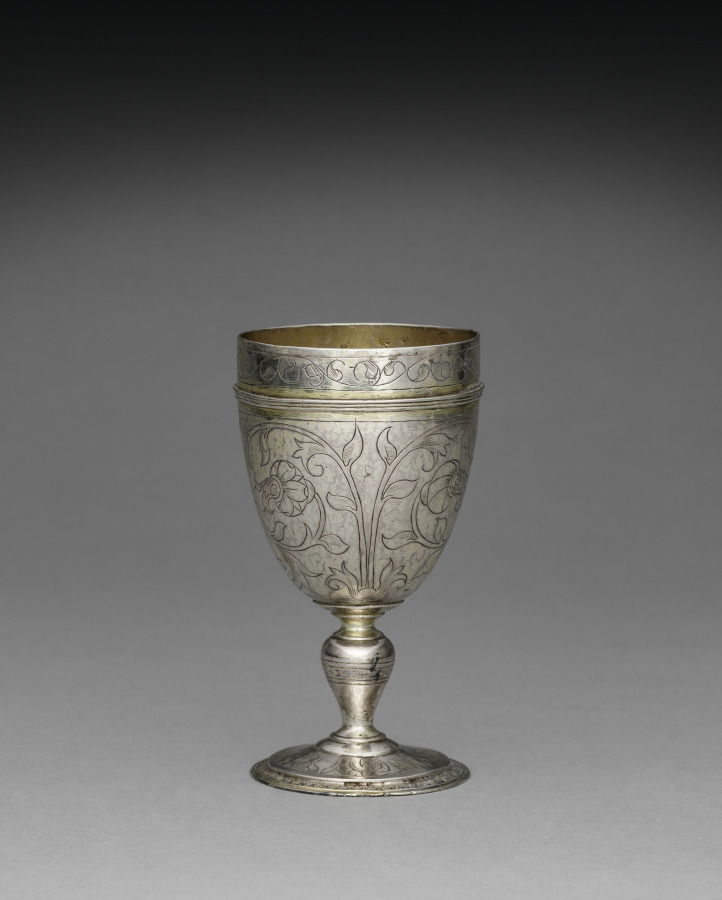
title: Standing Cup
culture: London, England: late 16th century, late 16th century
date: 1593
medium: silver, partially gilt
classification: Silver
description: Produced during the last years of the Tudor dynasty (1485–1603), this vessel exemplifies the symmetrical patterns, horizontal designs, and clear division of space typical of English silverwork at the time. The functional shape and ornamental designs characteristic of standing cups made them ideal for ceremonial occasions.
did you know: This cup has a lid. See cover record.